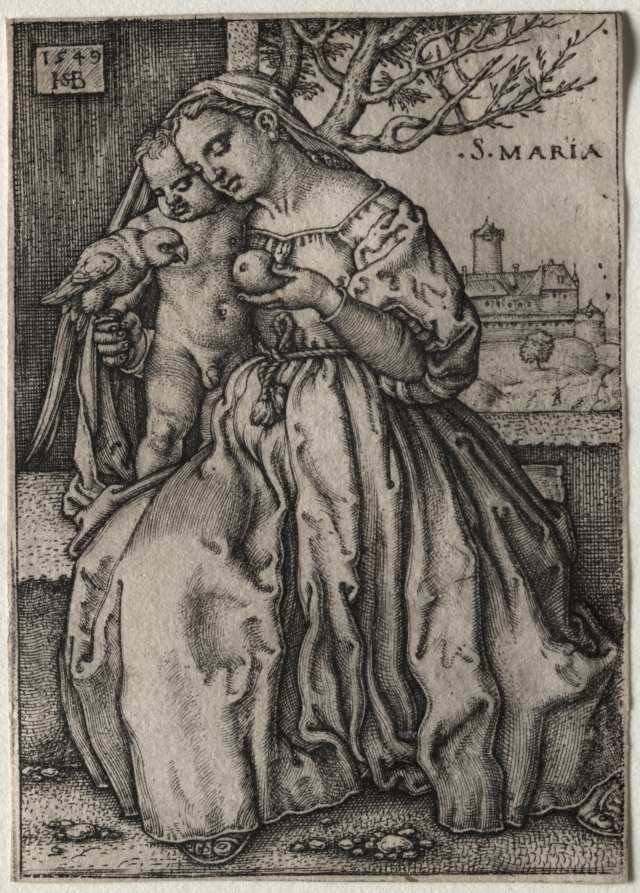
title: Virgin and Child with Parrot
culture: Germany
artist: Hans Sebald Beham (German, 1500–1550)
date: 1549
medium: engraving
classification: Print